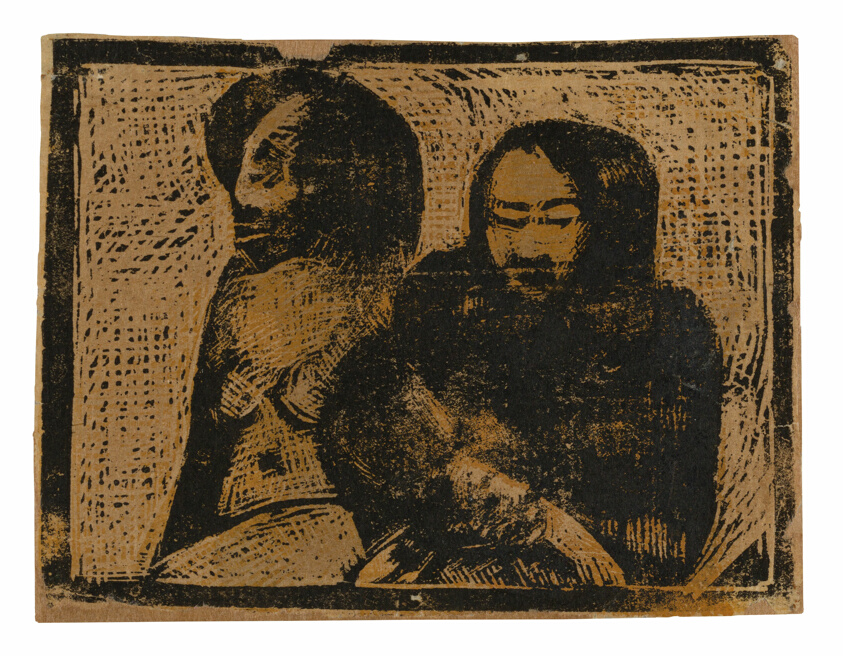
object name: Print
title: Two Maoris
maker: Paul Gauguin (French, 1848-1903)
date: 1896/97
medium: Wood-block print printed twice in ocher and black ink, with red-brown watercolor on brown laid Japanese paper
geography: France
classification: woodcut; print; prints and drawing